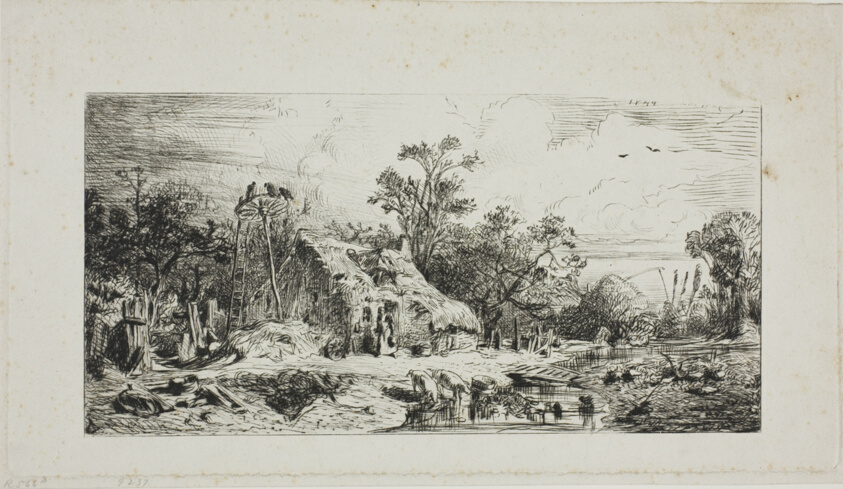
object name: Print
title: Landscape with Thatched Cottages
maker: Charles Émile Jacque (French, 1813-1894)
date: 1844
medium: Drypoint on cream wove paper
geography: France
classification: etching; print; prints and drawing